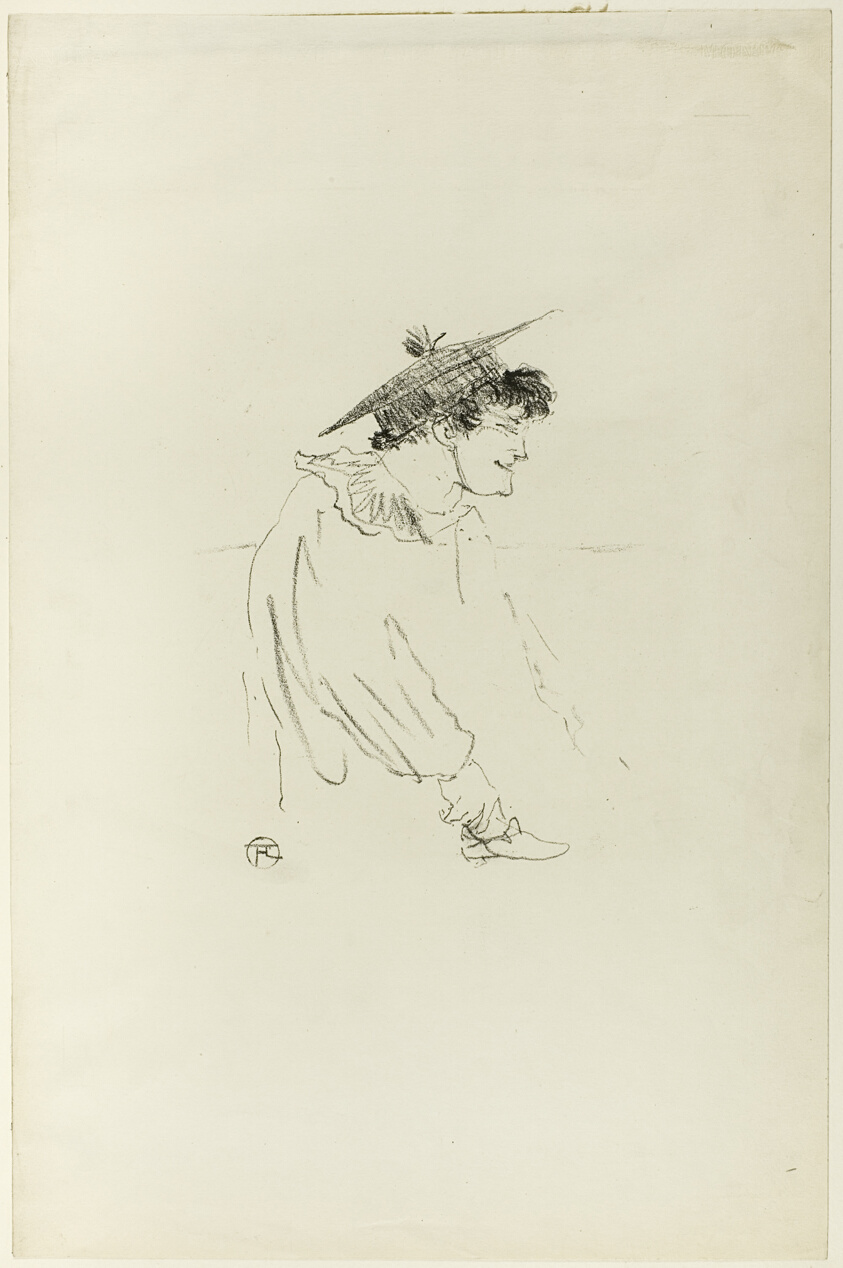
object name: Print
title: Small English Girl (Miss Dolly)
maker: Henri de Toulouse-Lautrec (French, 1864-1901)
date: 1899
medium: Lithograph on cream wove paper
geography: France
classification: lithograph; print; prints and drawing